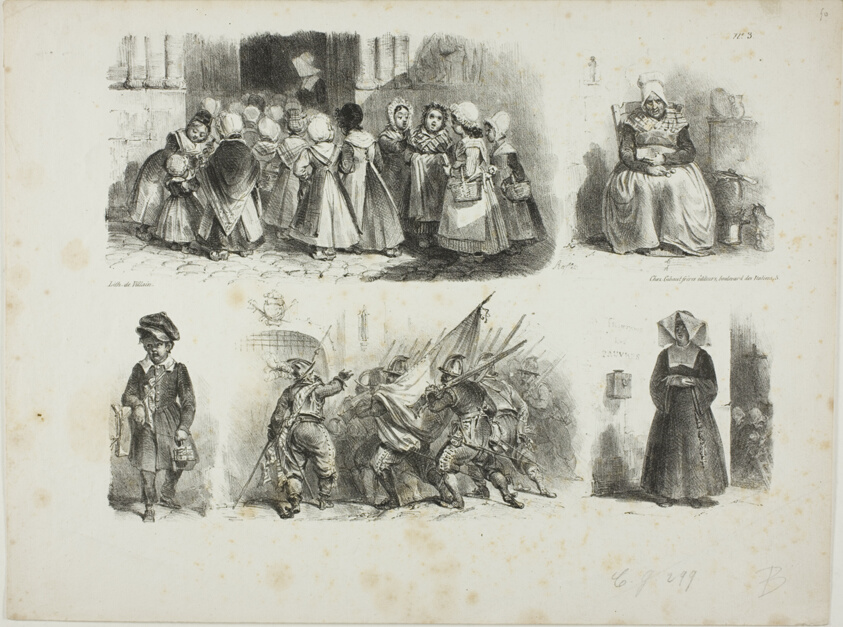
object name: Print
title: Sheet of Sketches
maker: Denis Auguste Marie Raffet (French, 1804-1860); published by Chez Gihaut Frères (French, 19th century); printed by François le Villain (French, active 19th century)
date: 1828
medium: Lithograph in black on ivory wove paper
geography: France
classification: lithograph; print; prints and drawing